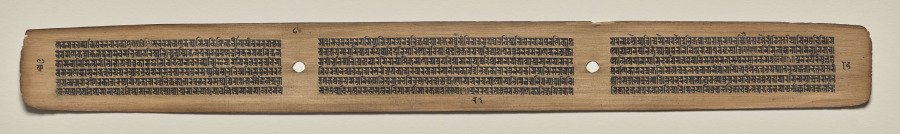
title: Text, Folio 86 (verso), from a Manuscript of the Perfection of Wisdom in Eight Thousand Lines (Ashtasahasrika Prajnaparamita-sutra)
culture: Eastern India, Bihar, Vikramashila Monastery. Painting: Nepal, Kathmandu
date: Sunday, September 14, 1119 (year 239 of the Newar Samvat in the month of Ashvina)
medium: gum tempera and ink on palm leaves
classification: Painting